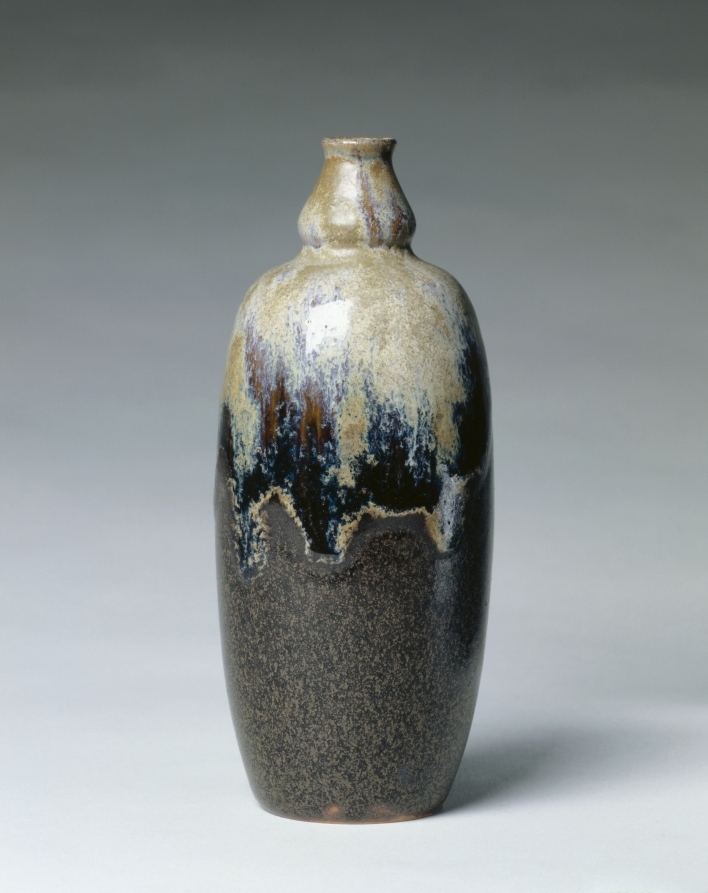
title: Vase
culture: France, early 20th Century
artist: Auguste Delaherche (French, 1857–1940)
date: c. 1910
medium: stoneware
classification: Ceramic